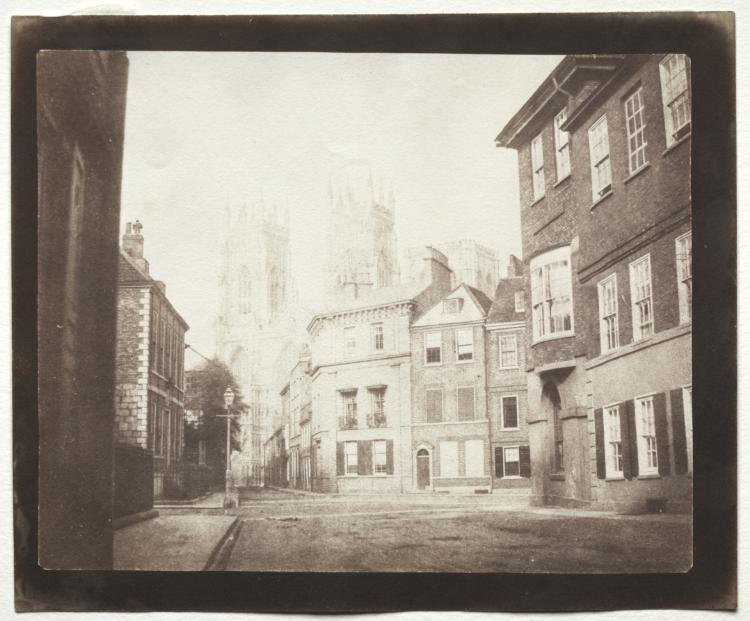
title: A Scene in York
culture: England, 19th century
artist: William Henry Fox Talbot (British, 1800–1877)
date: 1845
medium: salted paper print from calotype negative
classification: Photograph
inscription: Written in pencil on verso: "426"